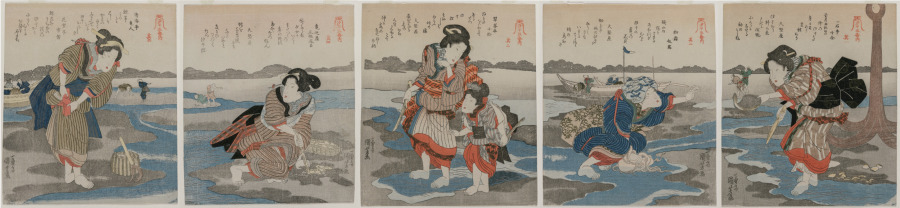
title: A Low Tide Pentaptych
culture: Japan, Edo period (1615–1868)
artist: Utagawa Kuniyoshi (Japanese, 1797–1861)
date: c. 1830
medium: Pentaptych of color woodblock prints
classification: Print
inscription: Signature: Ichiyusai Kuniyoshi ga.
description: Five surimono 刷物, privately commissioned prints known literally as "printed things," make up this image of women collecting sea life at low tide. Ten poems written by members of a poetry salon appear across the upper part of the composition. All but one contain the words "low tide," with the remaining poem describing abalone as a sought-after jewel.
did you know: A pentaptych is a composition of five parts.